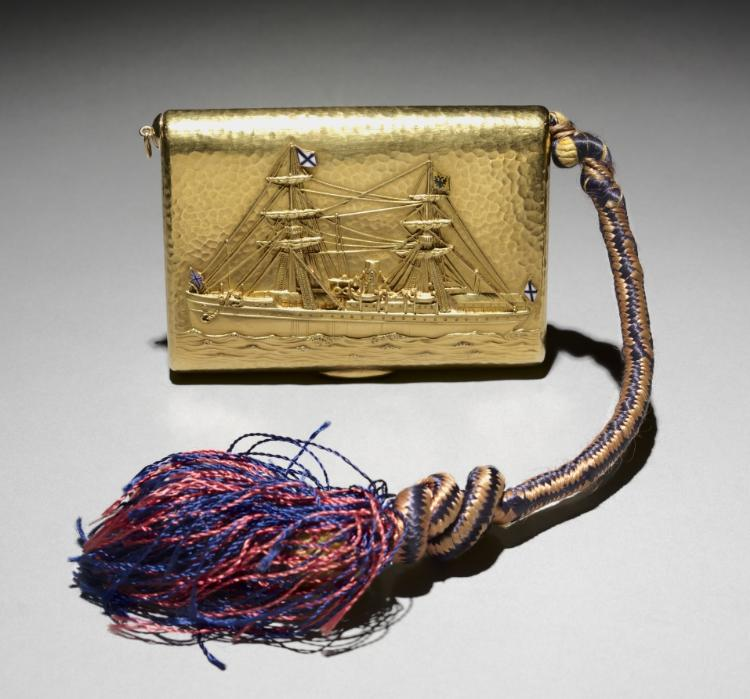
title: Cigarette Case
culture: Russia, St. Petersburg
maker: attributed to House of Fabergé (Russian, 1842–1918)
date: 1886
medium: gold, enamel, diamonds, silk cord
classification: Miscellaneous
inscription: inscribed: In Rembrance/from Sandro/Sevastopol/1886/6 May in Cyrillic script.